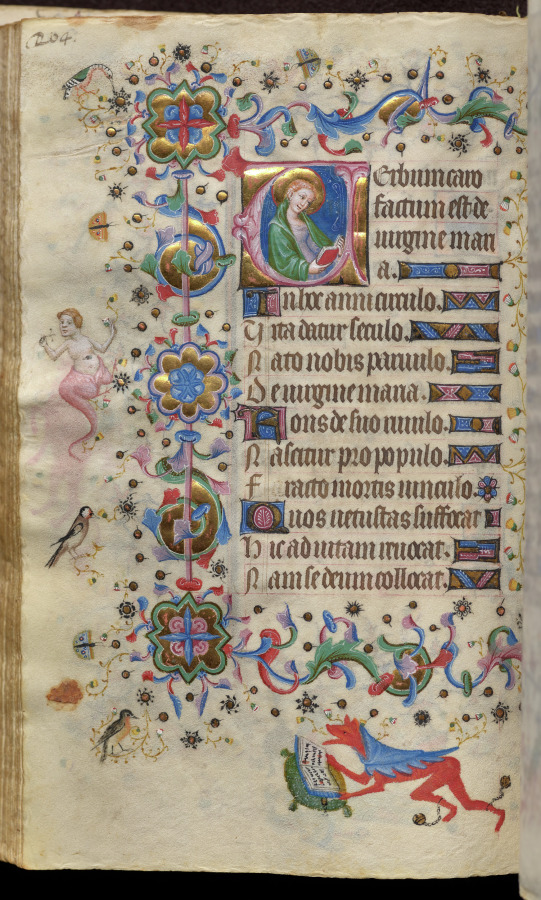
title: Hours of Charles the Noble, King of Navarre (1361-1425): fol. 102v, Text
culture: France, Paris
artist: Master of the Brussels Initials and Associates (French)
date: c. 1405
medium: ink, tempera, and gold on vellum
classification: Bound Volume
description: This precious volume was obviously highly prized by its owner, the French-born King of Navarre, who had his coat of arms painted on no less than twenty folios. Rather than directly commissioning this manuscript from a specific workshop, it seems that Charles the Noble acquired his book of hours -- perhaps ready-made for the luxury market -- while on a trip to Paris in 1404-05. A collaborative effort, six painting styles are evidenced within the pages of this codex, those of two Italians, two Frenchmen, and two Netherlanders. The painter who was responsible for the planning and decoration of the book, and who produced seventeen of the large miniatures, was a Bolognese artist known as the Master of the Brussels Initials. His principal assistant, responsible for most of the borders, was a Florentine who signed his name "Zecho" da Firenze on folio 208 verso.